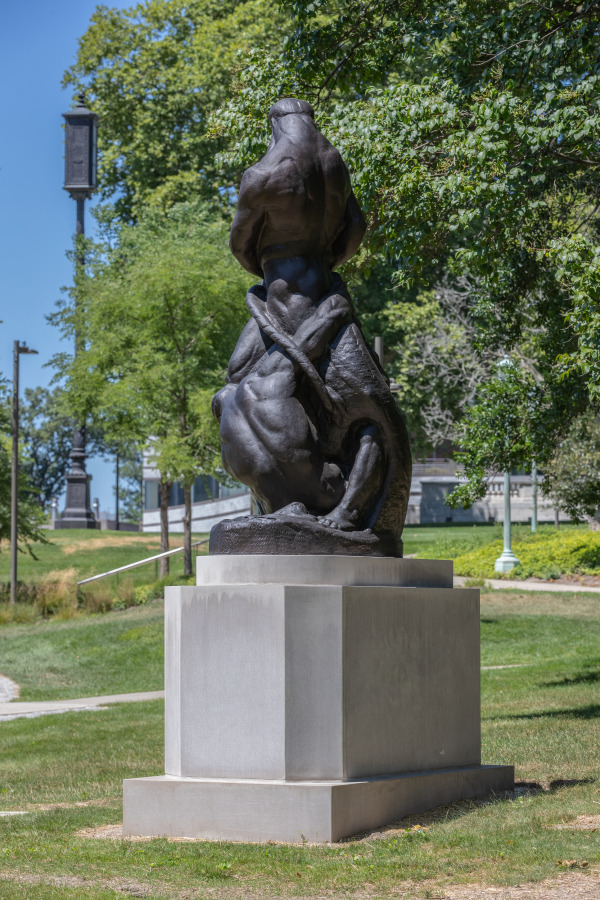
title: The City Fettering Nature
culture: America, Ohio, Cleveland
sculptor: Alexander Blazys (American, born Russian Empire [now Lithuania], 1894–1963)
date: 1927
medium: bronze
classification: Sculpture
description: Alexander Blazys, a Lithuanian immigrant, became a leading sculptor in Cleveland during the 1920s, when he created The City Fettering Nature for the Cleveland Museum of Art’s grounds. In this composition, Utility and Beauty, two characteristics of the city, are shown as intertwined figures attempting to subdue Nature’s power. The brawny figure of Nature, still standing despite this attack, struggles to free himself from the restraints.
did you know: This monumental bronze sculpture weighs 1,500 pounds and requires a crane to install.